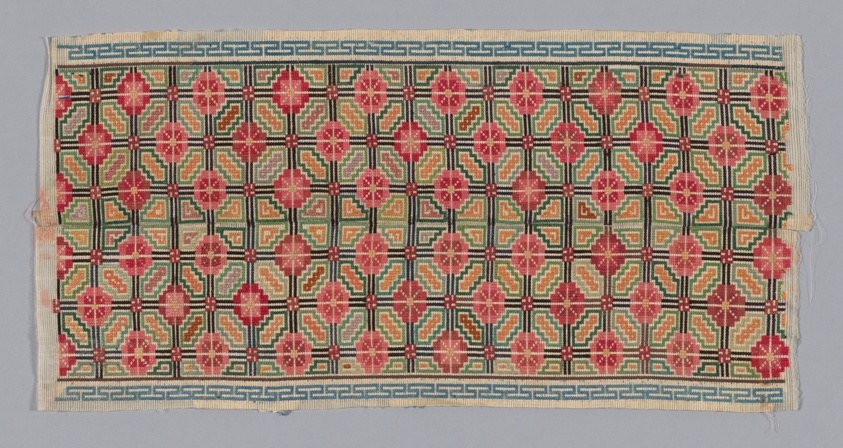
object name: Costume and Accessories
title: Panel (Trouser Band)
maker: Han-Chinese (China)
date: Qing dynasty (1644–1911), 1875/1900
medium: embroidered gauze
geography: China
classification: costume - embroidery; embroidery; costume